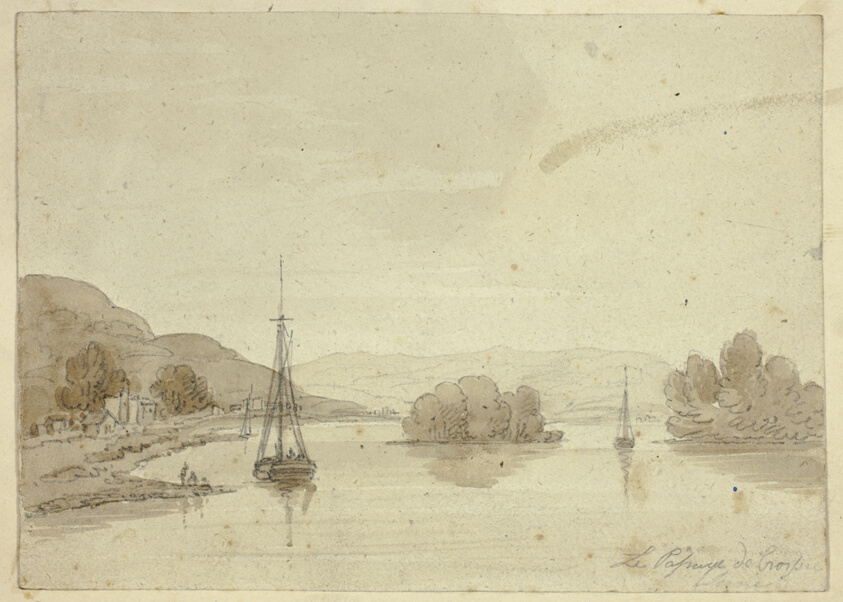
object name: Drawing and Watercolor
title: Landscape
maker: William Henry Stothard Scott of Brighton (English, 1783-1850); or Joseph Powell (English, 1780-1834); or an unknown artist (British, 19th century)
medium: Brush and brown wash, with graphite, on ivory wove paper, tipped onto cream card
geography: England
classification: ink or chalk wash; drawings (visual works); prints and drawing